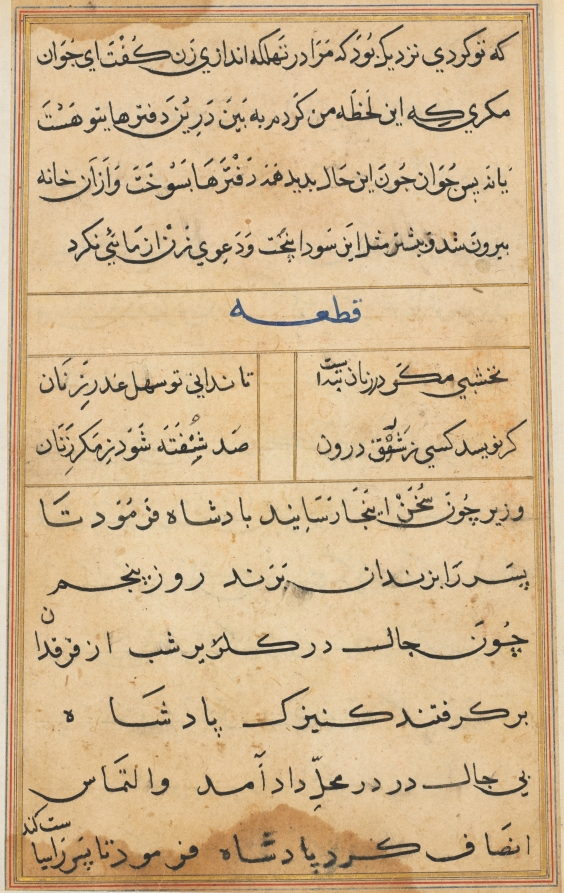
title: Page from Tales of a Parrot (Tuti-nama): text page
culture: Mughal India, court of Akbar (reigned 1556–1605)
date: c. 1560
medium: gum tempera, ink, and gold on paper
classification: Painting